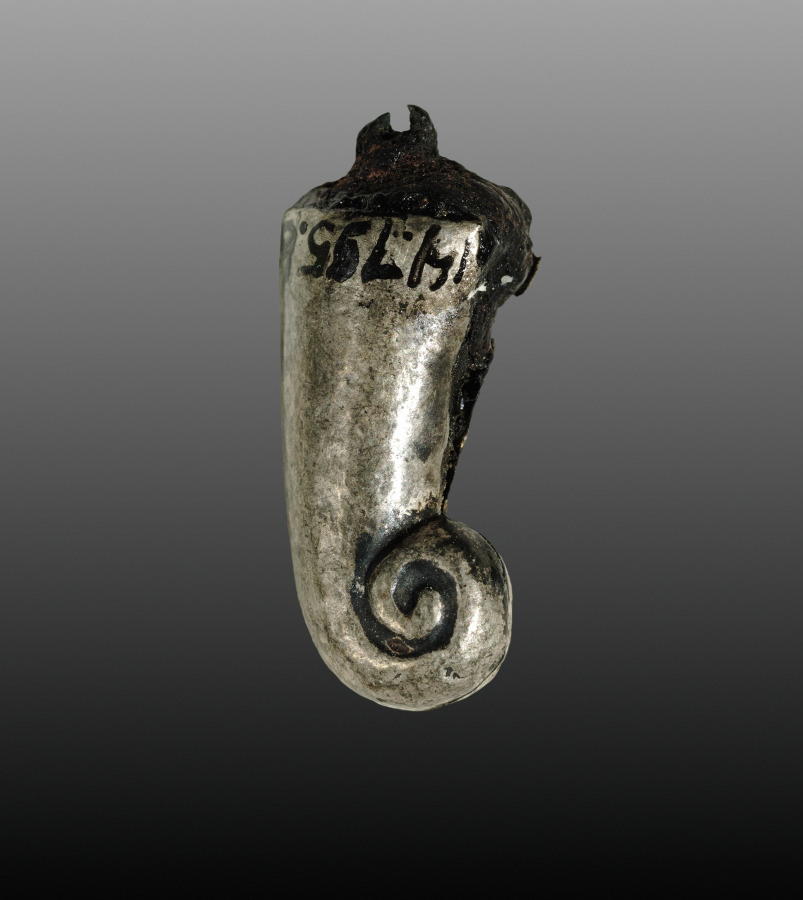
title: Sidelock (one of a pair)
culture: Egypt, Middle Kingdom (2040–1648 BCE), Dynasty 12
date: 1980–1801 BCE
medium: Electrum (?) over a clay-bulked resinous core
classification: Jewelry